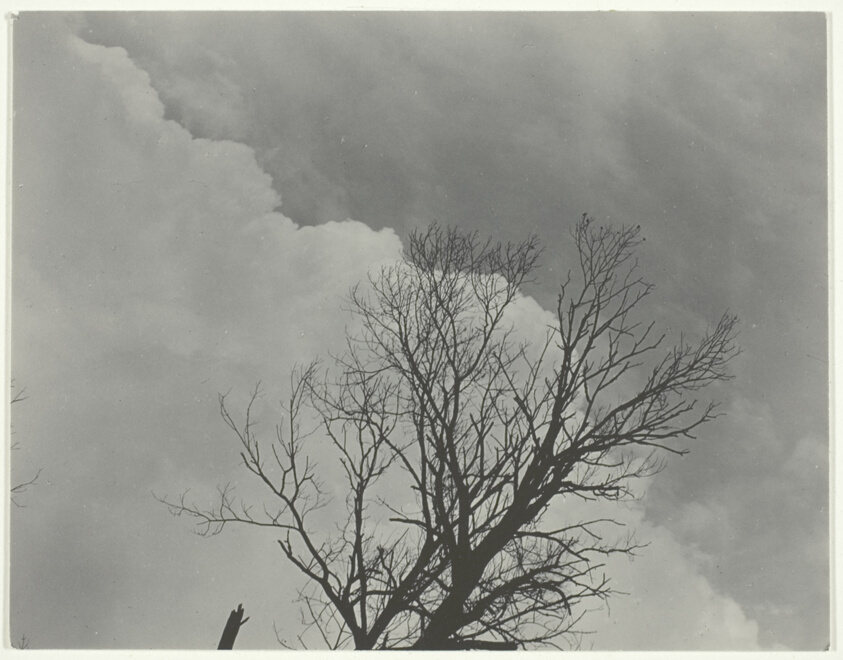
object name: Photograph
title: Tree Set 3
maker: Alfred Stieglitz (American, 1864–1946)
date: c. 1924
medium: Gelatin silver print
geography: United States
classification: gelatin silver (developing-out-paper) pr; photographic process; photography; photograph